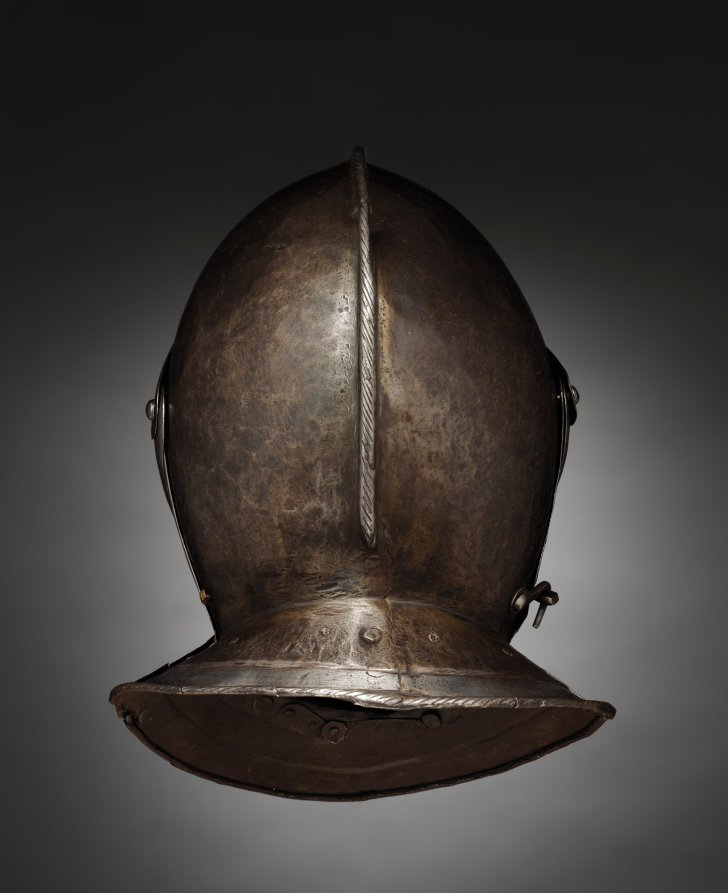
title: Savoyard Helmet (Todenkopf)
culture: Italy or Germany, early 17th century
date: c. 1600–20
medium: steel, blackened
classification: Arms and Armor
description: The term “Savoyard helmet” is used today to evoke the elite cavalry units formed by Charles Emanuel I, Duke of Savoy (1580-1630). Such helmets were designed principally to withstand and protect the wearer from shot from the powerful wheel-lock guns of the day, though their secondary function was to intimidate and terrify. The design of the helmet suggests a human face or skull. They were known as todenkopf or “death’s head” helmets in Germany. The helmet would have originally been associated with a three-quarter cuirassier armor. Similar armors are displayed nearby.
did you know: This type of helmet is also called a "todenkopf," translating to "death's head."